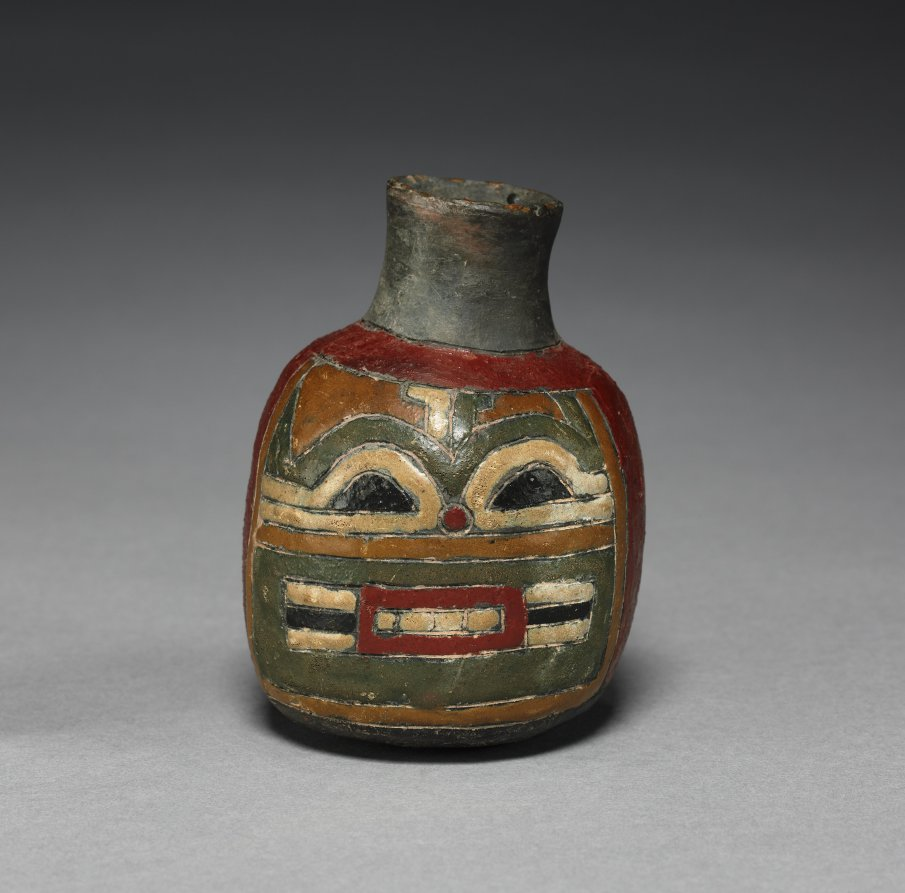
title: Small Bottle with Feline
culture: Peru, South Coast, Paracas (Cavernas) style (700 BCE–1 CE)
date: 700–1 BCE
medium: earthenware, resin-based paint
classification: Ceramic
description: Little is known of the meaning of the beautifully abstracted felines so often incised on Paracas ceramics. The designs achieve much of their complexity through color applied as resin-based paint after the vessel was fired in a smoky atmosphere that blackened its surface.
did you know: Small, wild, reclusive felines, pampas cats live on the margins of agricultural fields, where they prey on rodents and other pests that are a farmer’s bane.